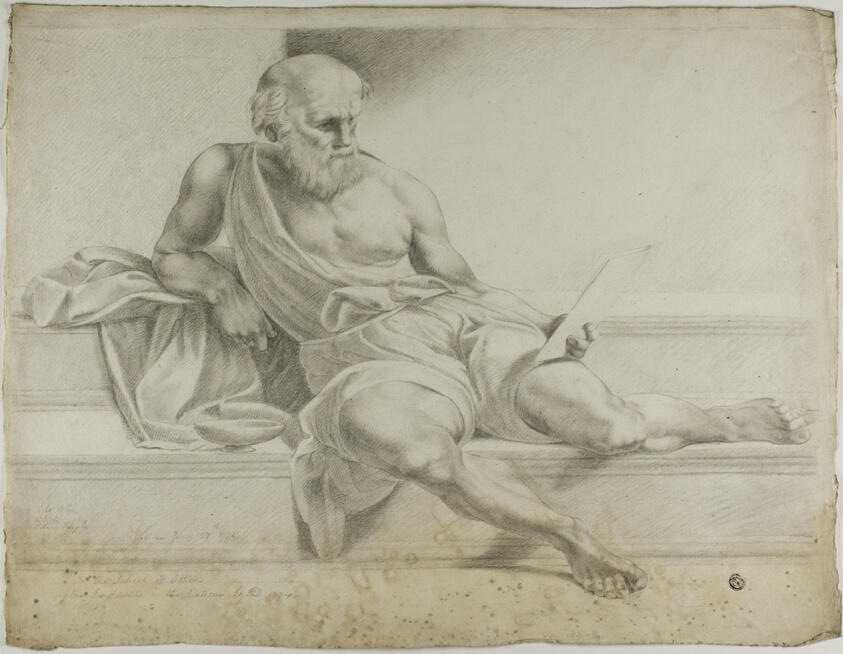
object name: Drawing and Watercolor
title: Diogenes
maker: John Downman (English, 1750-1824); or after Raffaello Sanzio, called Raphael (Italian, 1483-1520)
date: 1774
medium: Charcoal with stumping on ivory laid paper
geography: Italy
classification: charcoal; drawings (visual works); prints and drawing